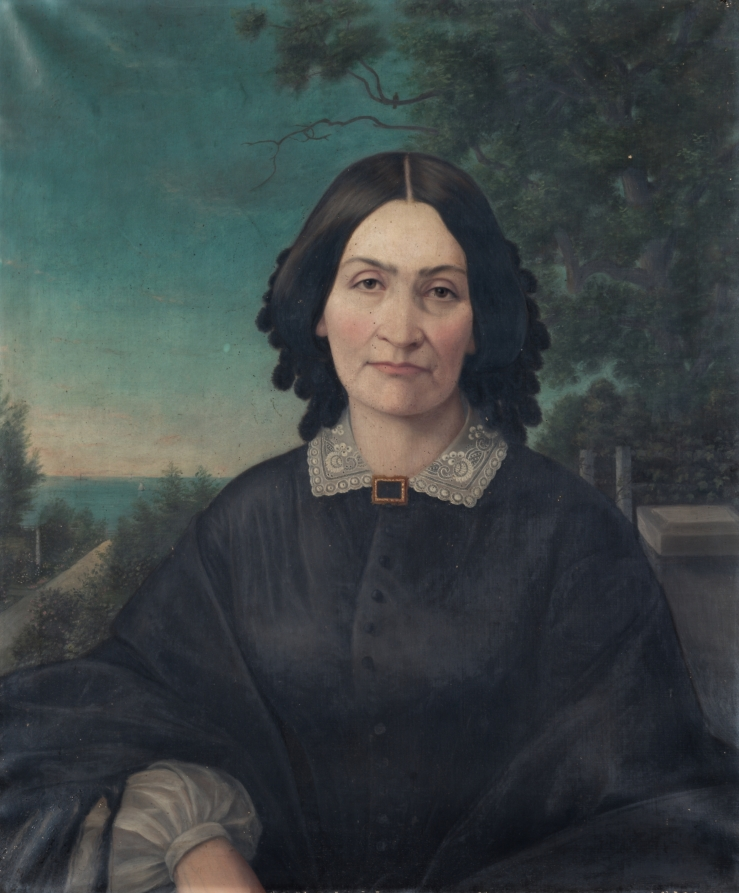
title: Julia Hulbert Hubbard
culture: America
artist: Anonymous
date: probably 1800s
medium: oil on canvas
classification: Painting